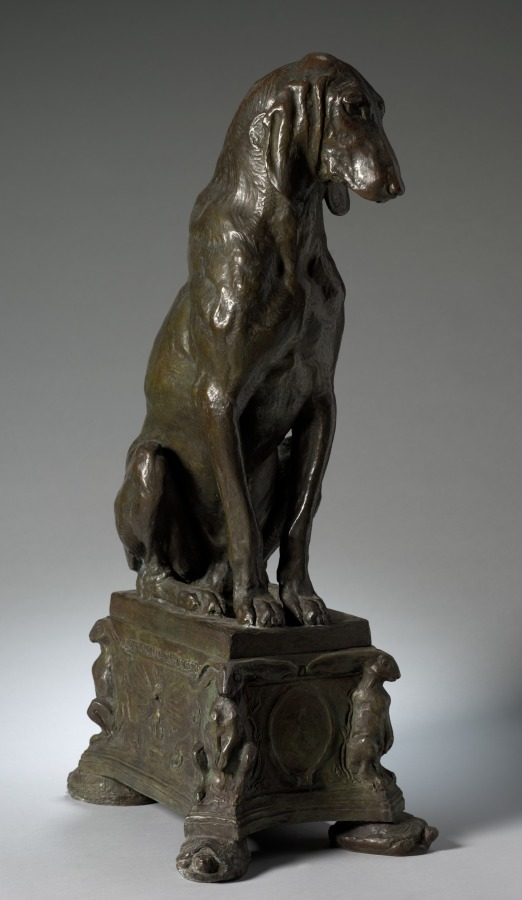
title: Hound (2 of 2)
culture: America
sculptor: Charles Cary Rumsey (American, 1879–1922)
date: 1912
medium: bronze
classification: Sculpture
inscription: Signed on plinth: © C. C. Rumsey